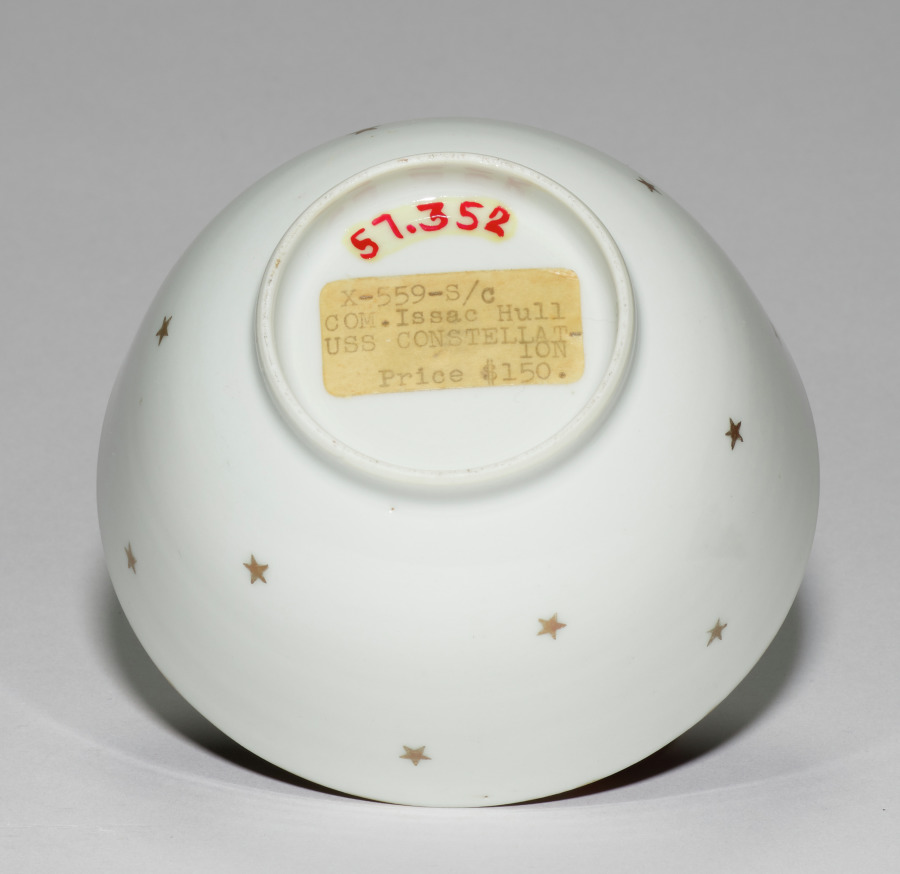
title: Cup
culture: China, Chinese Export, 19th century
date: 1800s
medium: porcelain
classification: Ceramic